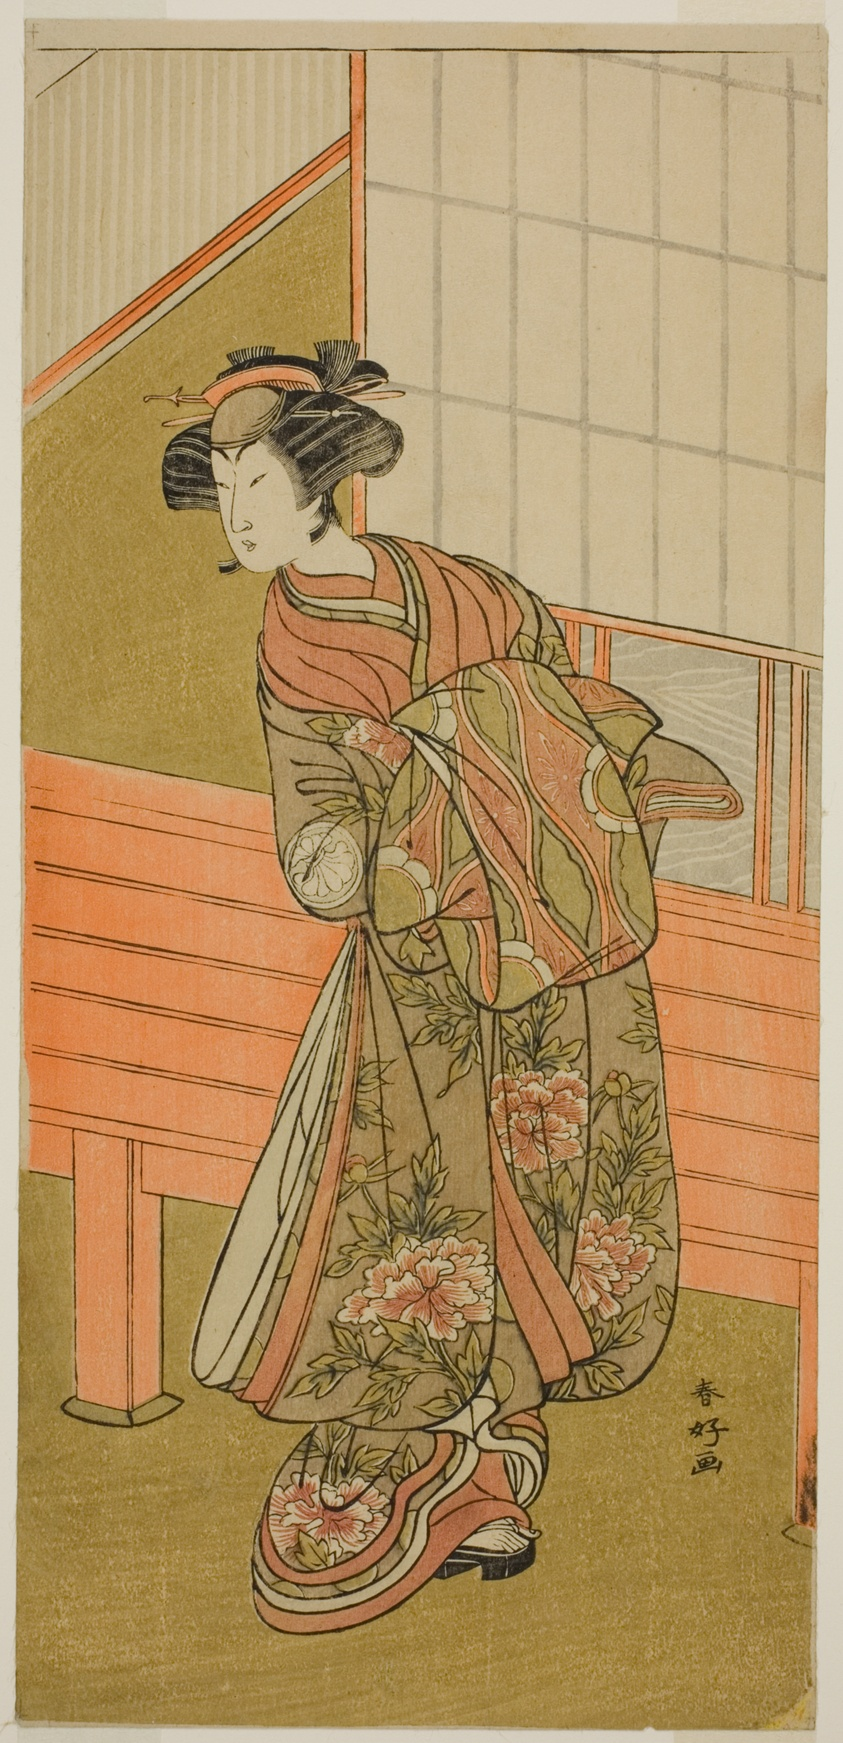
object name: Print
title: The Actor Segawa Kikunojo III as the Courtesan Takamura of Onoteruya (?) in the Play Sugata no Hana Yuki no Kuromushi (?), Performed at the Ichimura Theater (?) in the Eleventh Month, 1776 (?)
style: Japanese (culture or style)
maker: Katsukawa Shunko I; Japanese, 1743-1812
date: c. 1776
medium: Color woodblock print; hosoban; from a multisheet composition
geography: Japan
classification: woodblock print; print; asian art